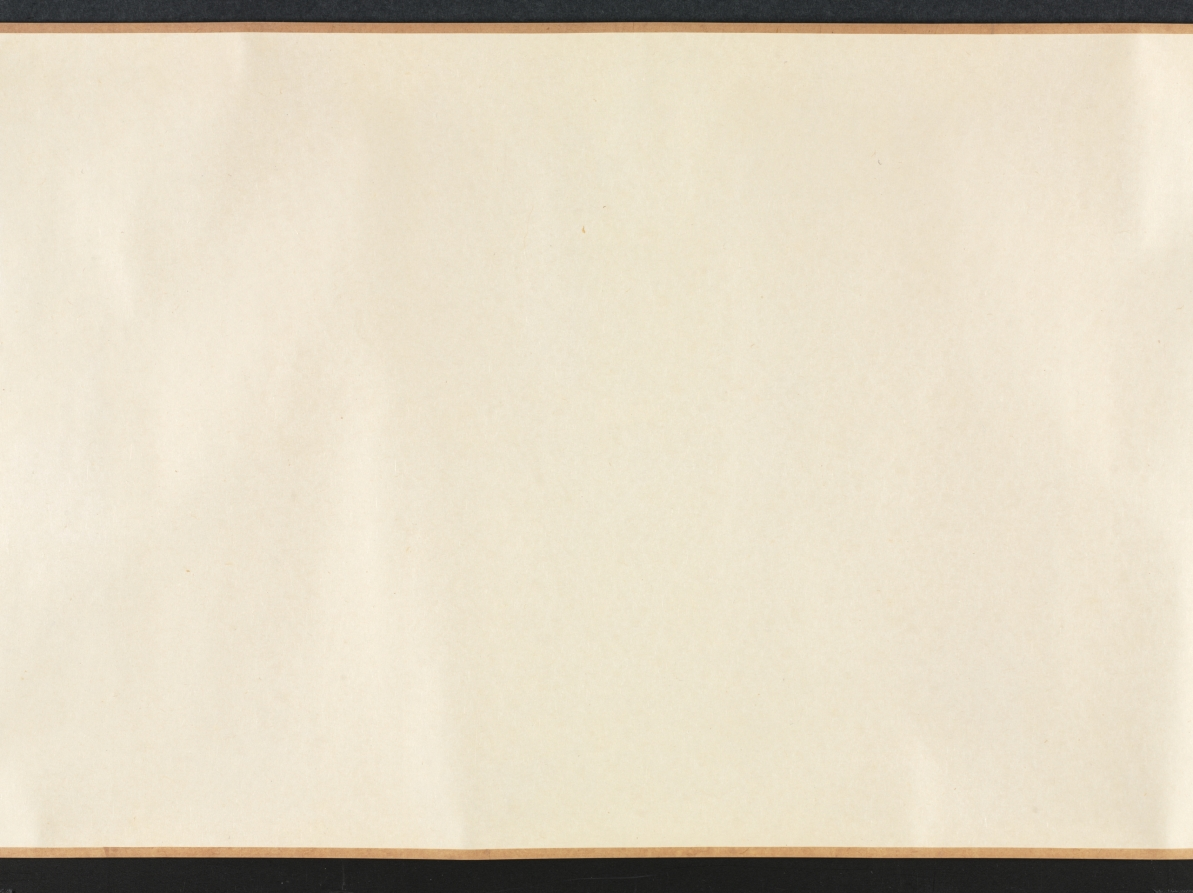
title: Hall of Lofty Pines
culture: China, Qing dynasty (1644-1911)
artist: Wang Hui (Chinese, 1632–1717)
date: 1703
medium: handscroll; ink and color on paper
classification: Painting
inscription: [題] 松喬堂圖 康熙癸未夏六月, 海虞耕煙散人王翬畫。[印]王翬之印; 石谷. [左下] 來青閣; 耕煙野老時年七十有二.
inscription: 松喬堂圖一卷，海虞石谷王君為靜海近公厲少司冦公作也。圖成于癸未之夏。未幾而公遂仙去。公令子今編修君南湖屬余題跋其後。余與公同官侍從，交契最深。側見公之清修純德，蔚為聖天子所眷重。侍直內廷，密勿贊襄，幾二十餘年。蒼生之所以受賜，士林之所以沐德者，天下莫能窺，在廷莫能悉。而公卒不言。以故宸衷日益契，恩禮亦日益渥。雖年逾懸車，時有歸老之念。而上固不聼公之去。其所謂松喬堂者，御書以賜公者也。蓋以松比公之清風勁節，而歲寒不改，經霜彌茂。則又以期公之壽考未有艾焉。公知此身未易乞，而山林槃磵之樂，止可寄諸寤思。此松喬堂圖之所由作也歟。石谷此圖，結構精密，筆墨超邁。其寫樹木之蒼蔚，堂宇之靚幽。恍見摩詰輞川樂天廬山之勝。獨惜公未得一日徜徉故園以償其願。即繪於圖亦未得以永其趣，此編修君之所以眷眷不忘也。雖然千歳之松喬，下蔭百畝，上以修棟梁之需。然則上當日名堂之意，不更望於後之人襲其芘而養其材也哉。吾願編修君之寶斯圖。并望君之塗塈丹雘，大其堂構也已矣。 康熈丙戍重陽三日，雲間王鴻緒跋。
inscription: 10 additional seals: 1 seal of Li Duna 勵杜納 (1628–1703); 4 seals of Zha Ying 查瑩 (jinshi of 1766); 5 seals of Li Yun (dates unknown).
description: Wang Hui 王翬, a leading painter in the orthodox school of the early Qing dynasty (1644–1911), was commissioned to paint this landscape with a country estate for Li Duna 勵杜納 (1628–1703), vice minister of justice in Emperor Kangxi’s court. The emperor had honored Li by granting him a piece of calligraphy with the name of Li’s retirement retreat, “Hall of Lofty Pines.” He drew a comparison between pines and Li’s upright character, resilience, and longevity. Wang Hui’s painting was supposed to allow Li to imagine living in a beautiful, secluded compound among the hills and pines. Sadly, Li died before seeing the completed painting and before receiving the emperor’s permission to retire. The landscape begins with peaceful riverbanks and low hills. The pines around the estate in the middle of the handscroll are truly lofty, some stretching even beyond the frame of the painting. Li Duna, the estate’s owner, is shown twice in his serene mountain retreat: first approaching the entrance to the compound with two servants at the right, and then later in the scroll, to the left, reading in the comfort of an inner room.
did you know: One servant carries the estate owner's carefully wrapped qin, a type of zither.